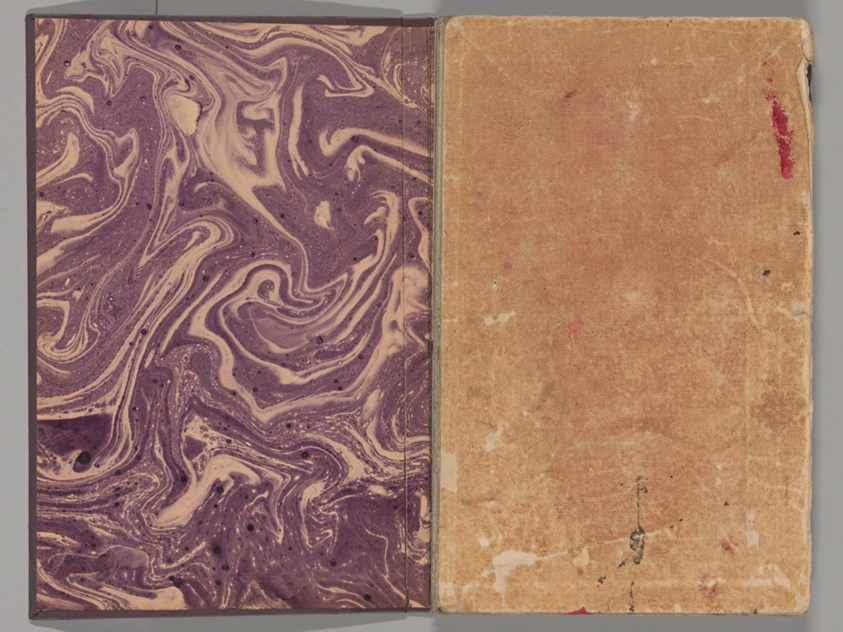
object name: Book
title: Soken sekisatsu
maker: Ito Jakuchu (Japanese, 1716-1800)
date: 1767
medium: Woodblock printed book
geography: Japan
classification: book